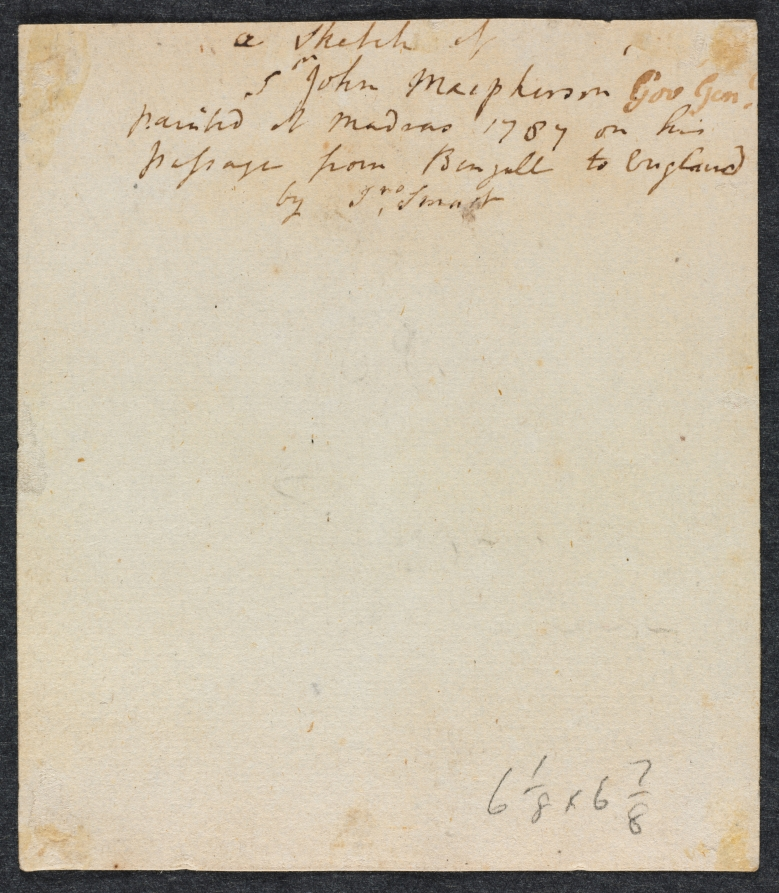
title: Portrait of Sir John Macpherson, 1st Baronet, Governor-General of India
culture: England, 18th century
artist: John I Smart (British, 1741–1811)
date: 1787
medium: watercolor and gouache heightened with white gouache on paper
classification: Portrait Miniature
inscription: signed, lower right, in black ink: J S / 1787 / Madras ; VERSO, lower right, in graphite: 6 1/8 x 6 7/8 Foskett, Daphne. John Smart: The Man and His Miniatures, pp. 13, 76, 89. London: Cory, Adams & Mackay, 1964.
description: The sitter’s head and shoulders face left. He smiles slightly and has light blue eyes, with his powdered hair curled above the ear and tied en queue. He wears a green jacket edged in gold with gold buttons and dons a high white collar, a waistcoat, and a frilled cravat, each highlighted with white gouache. The nature of this work as a finished drawing rather than exclusively a preparatory sketch for a miniature on ivory is evident in the degree of finish of the sitter’s clothing, which is painted to the oval termination within a border of pale blue gouache. A Colnaghi label was removed from the verso after the work entered the museum’s collection. Sir John Macpherson (1745–1821) was the son of a Scottish minister. His many tours of service with the East India Company were marred by corruption and scandal. He was made acting governor-general of India in 1785–86 between the resignation of Warren Hastings (1732–1818) and the succession by Lord Cornwallis (1738–1805). Macpherson was created a baronet in 1786 when he was removed from office, returning to England shortly thereafter. He was an inveterate bachelor, popular in society for his handsomeness, charm, and facility with languages, but also known for his avarice and fraudulence. The work is signed with Smart’s initials and dated “1787 Madras” at the lower right. Macpherson was no longer governor-general in 1787 and would have been preparing to return to England when this portrait was painted. The drawing is inscribed on the back in the artist’s hand: “a sketch of Sir John Macpherson painted at Madras, 1787, on his passage from Bengall [sic] to England by Jno [sic] Smart.” Smart did not return to England until 1795, so the word passage must be defined as “on his journey” rather than “aboard ship.” At the time this portrait was taken, Macpherson was grappling with his premature removal from office and beginning to plot what would become many years of negotiations to regain his position or receive compensation for having lost it, though none of this emotional turmoil is visible in Smart’s portrait.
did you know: John Smart retained hundreds of sketches which were passed down in turn to his son, granddaughter, and great-grandchildren.